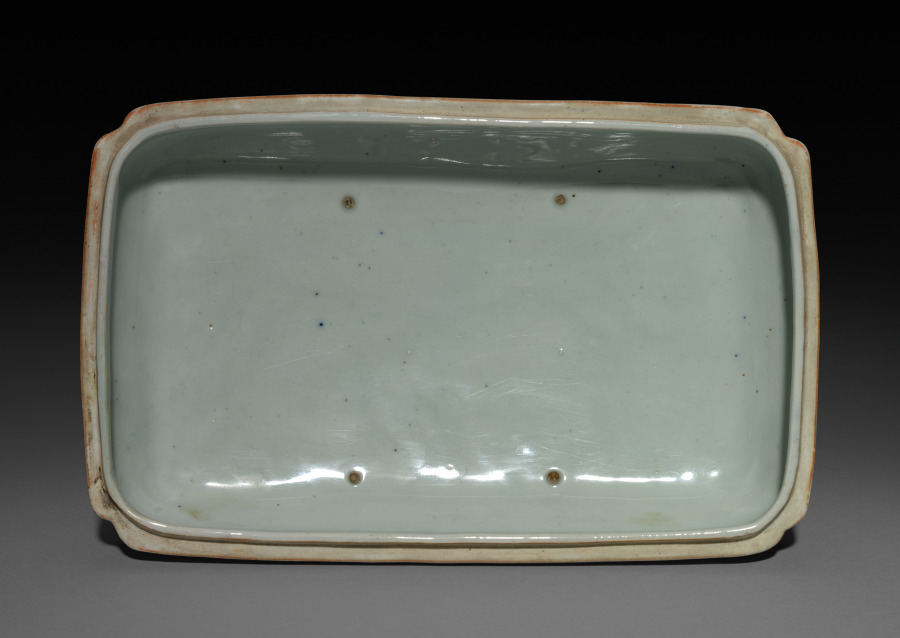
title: Covered Box with Dragons (lid)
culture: China, Jiangxi province, Jingdezhen kilns, Ming dynasty (1368-1644), Wanli reign (1572-1620)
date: 1573–1620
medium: porcelain with underglaze blue decoration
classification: Ceramic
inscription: 大明萬曆年製